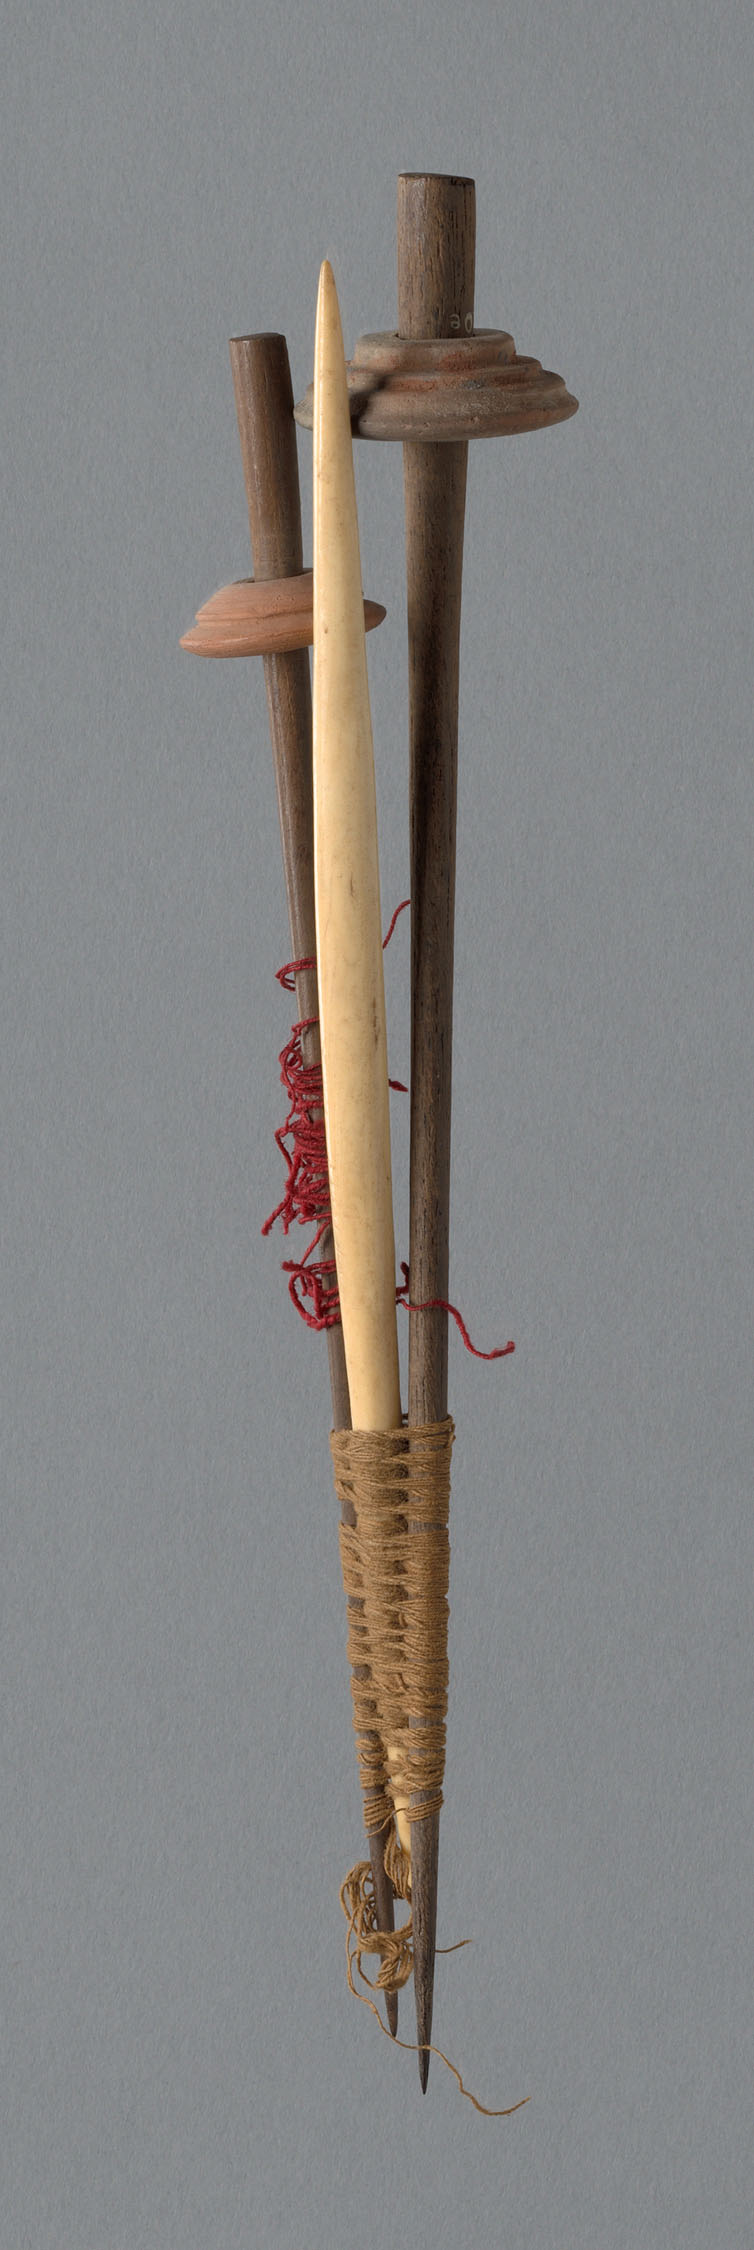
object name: non-art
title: Wooden Spindle with Ceramic Whorl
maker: Peru, Possibly central coast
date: 1000/1476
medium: Wood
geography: Peru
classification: spindles (textile working equipment); textile working equipment; accessories (object genre); textile